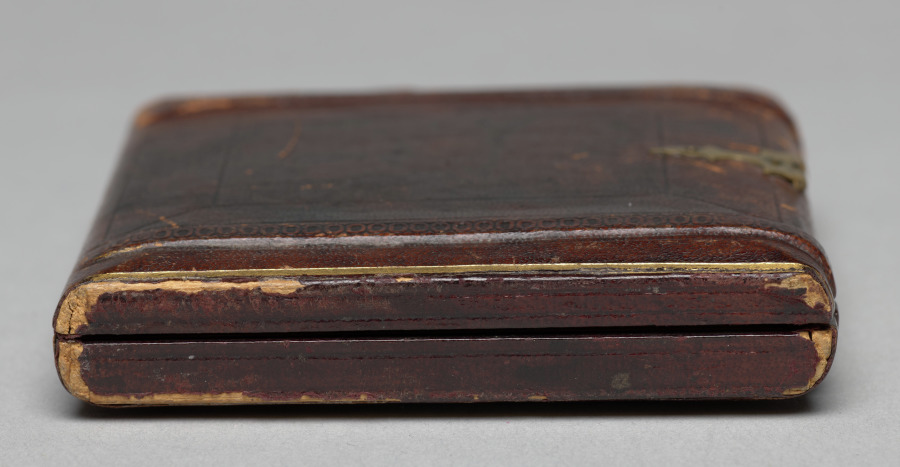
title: Miner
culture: America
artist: Robert H. Vance (American, 1825–1876)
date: c. 1853–55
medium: daguerreotype, sixth plate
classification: Photograph